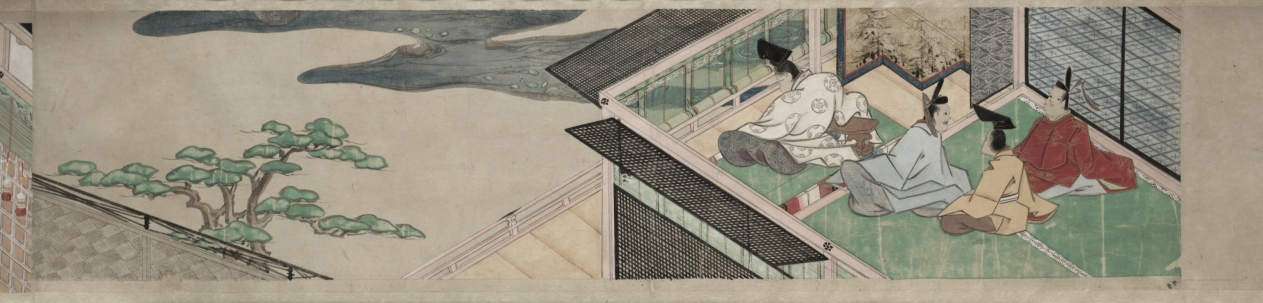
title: The Saltmaker's Story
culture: Japan, Edo period (1615–1868)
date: early 1600s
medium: One of a pair of handscrolls; ink, color, and gold on paper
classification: Painting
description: Once read and copied by girls at New Year’s celebrations and included in dowries, The Saltmaker’s Story is a rags-to-riches tale in which daughters are gifts from the gods. Despite his simple outlook, the main character progresses from humble roots as an associate at Kashima Shrine to the elite status of grandfather of the emperor through the intervention of the Kashima deity. The Saltmaker’s Story is traditionally presented in a set of three scrolls, but the text of this set has been removed by a previous owner, who remounted the illustrations as a pair. The paintings of this one take us from right to left through the first half of the tale.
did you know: This handscroll originally had texts before its paintings, but the texts were removed.